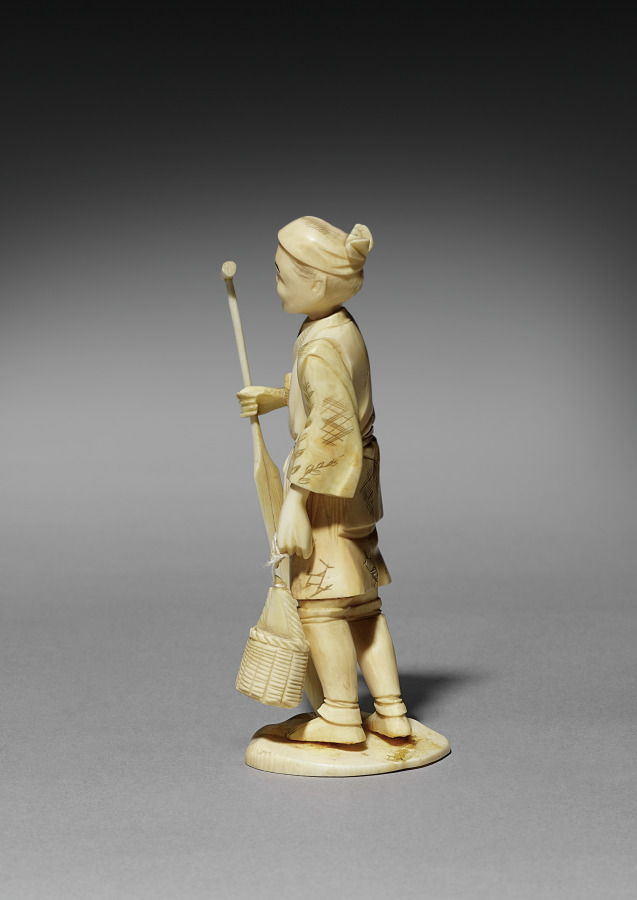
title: Man with a Basket and Paddle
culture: Japan, Meiji period (1868–1912)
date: late 1800s-early 1900s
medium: ivory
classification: Ivory